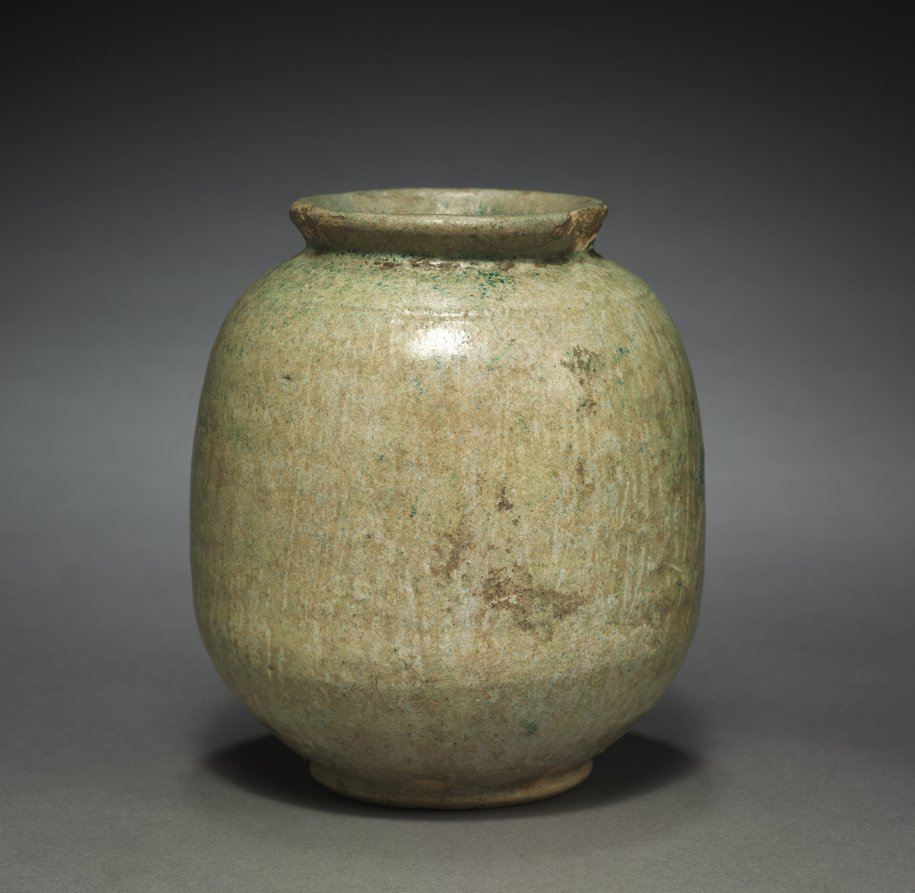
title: Ovoid Vase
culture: Parthian Empire (247 BCE–224 CE)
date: 1–200 CE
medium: terracotta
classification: Ceramic